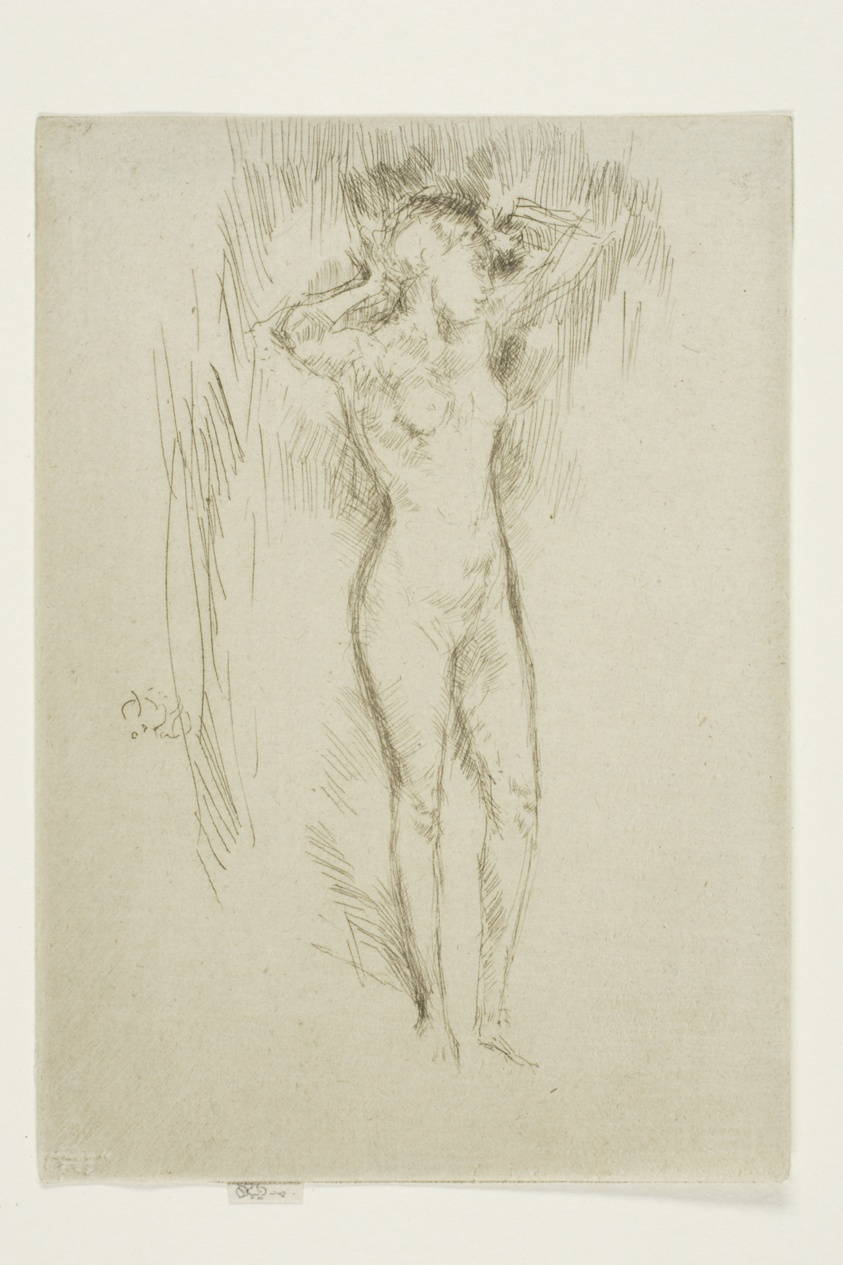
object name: Print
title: Binding the Hair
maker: James McNeill Whistler (American, 1834-1903)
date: 1887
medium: Etching with drypoint in black ink on cream laid paper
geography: United States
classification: etching; drypoint; print; prints and drawing; paper